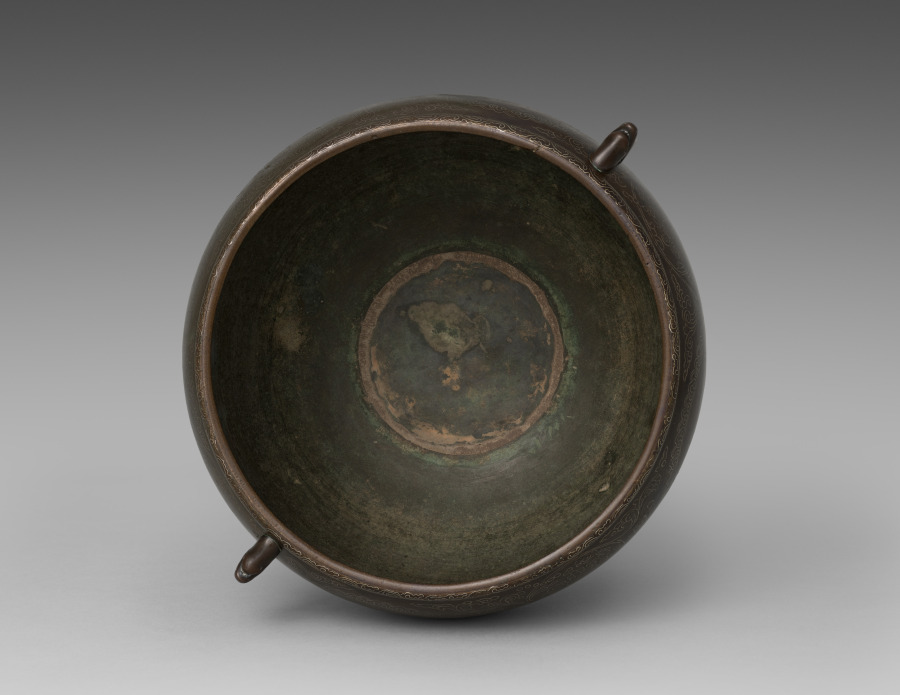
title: Basin with Inscribed Figures and Calligraphy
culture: Korea, Goryeo dynasty (918–1392)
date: 1100s–1200s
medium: bronze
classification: Metalwork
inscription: Each of the three roundels contain five-character, four-line poems with Buddhist messages.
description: This bronze basin may have been used for containing purified water. What makes this work charming is its intricate decoration done in silver inlay: the five-character, four-line poems interspersed among images of a child. The poems, which evoke the concept of nonattachment and nonduality, were written by Buddhist monks.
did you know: A child, one of the main decorative elements for this basin, is possibly a young Buddhist pilgrim named Sudhana, who took a long spiritual journey to search for enlightenment.